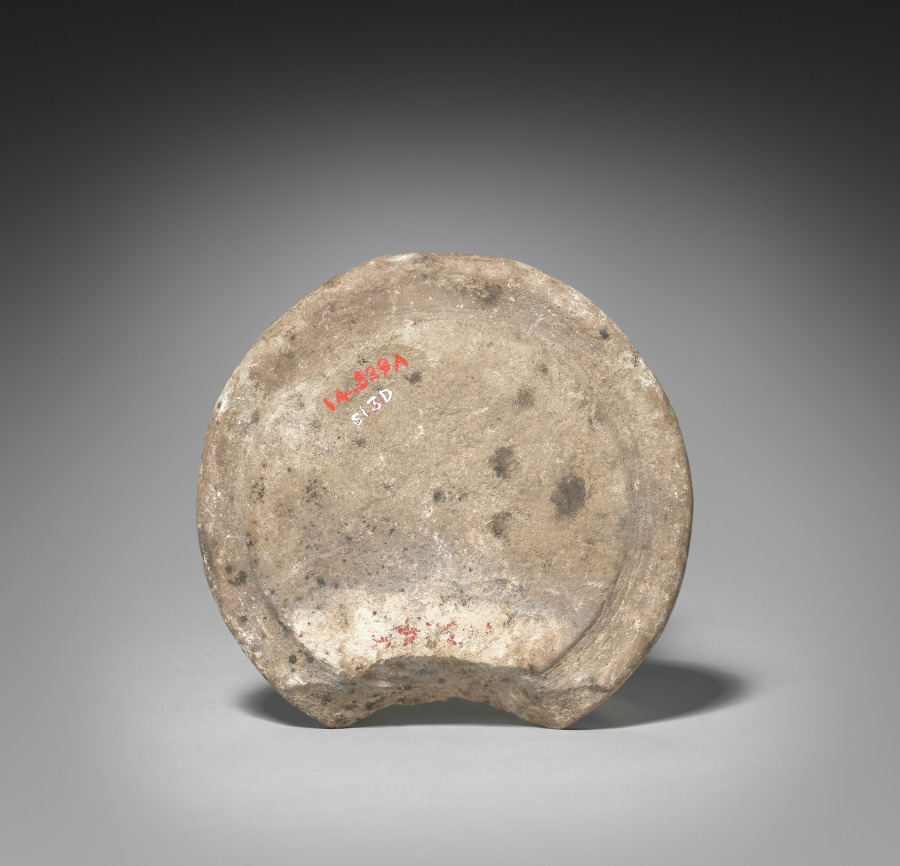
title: Shawabty Jar with Lid (lid)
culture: Egypt, New Kingdom (1540–1069 BCE), Dynasties 19–20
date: 1295–1069 BCE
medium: Nile silt ware; lid of limestone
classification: Funerary Equipment